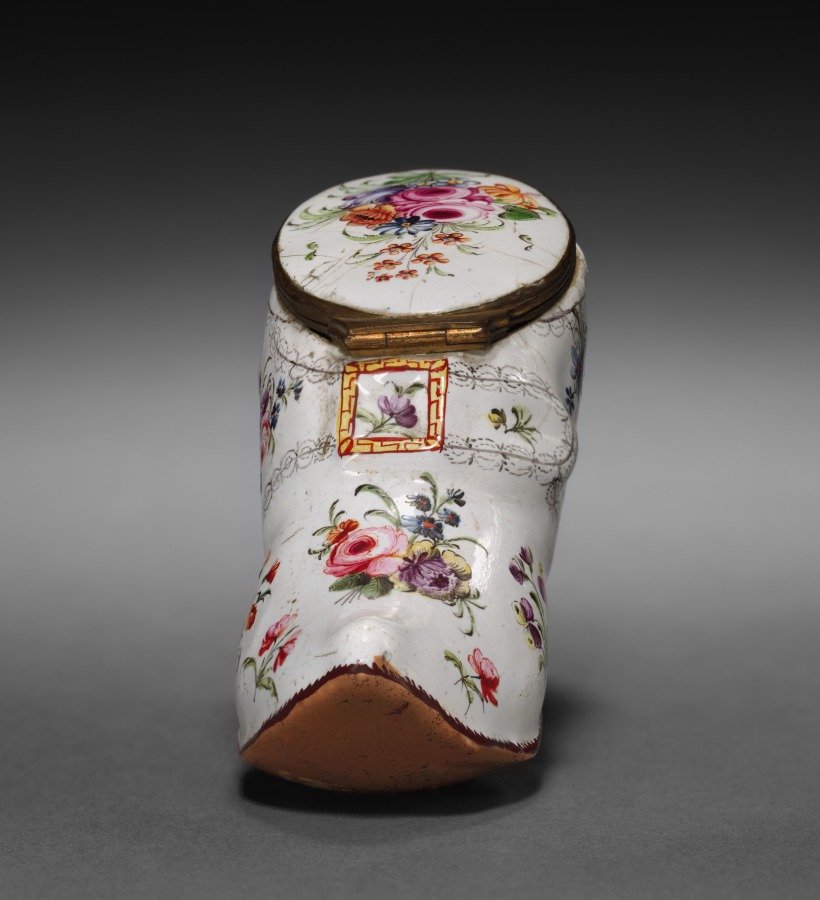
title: Box in Form of Shoe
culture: England or France, mid-18th Century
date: mid-18th century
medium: enamel on copper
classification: Enamel